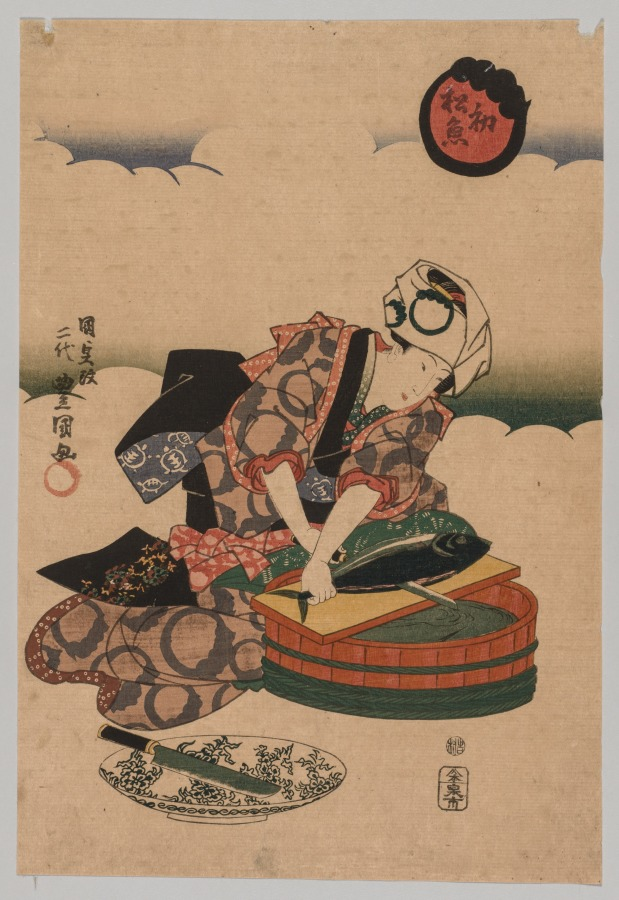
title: First Bonito of the Year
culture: Japan, Edo period (1615–1868)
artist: Utagawa Kunisada (Japanese, 1786–1865)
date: 1844–48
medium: color woodblock print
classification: Print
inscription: Signature: Kunisada - second generation Toyokuni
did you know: Historically, the year's first bonito was available in the fourth lunar month, or around May.